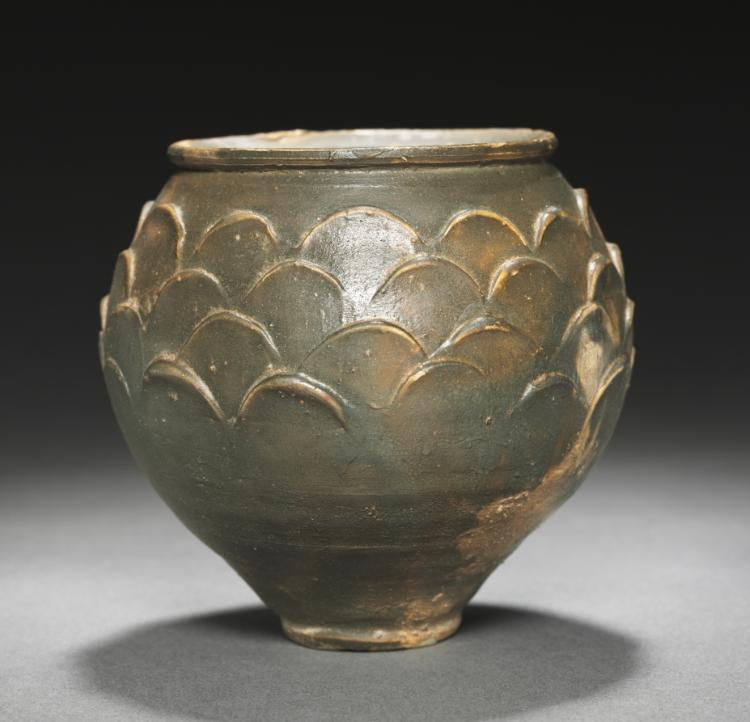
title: Beaker with Scale Pattern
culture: Rhenish (Cologne), Gallo-Roman, 1st Century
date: 1–100 CE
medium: reddish ware with dark gray burnished slip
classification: Ceramic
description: The dark brown glaze on the exterior of this beaker is patchy and irregular, allowing the light red clay beneath to show through. The glaze is especially light on the ridges of the raised scales that decorate the upper body of the vessel, arranged in four offset rows. The pattern was created by applying thick clay slip to the surface of the beaker after it was removed from the potter’s wheel.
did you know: Several textile fibers were found inside this beaker, suggesting that it may have contained an object or objects wrapped in cloth when it was buried.